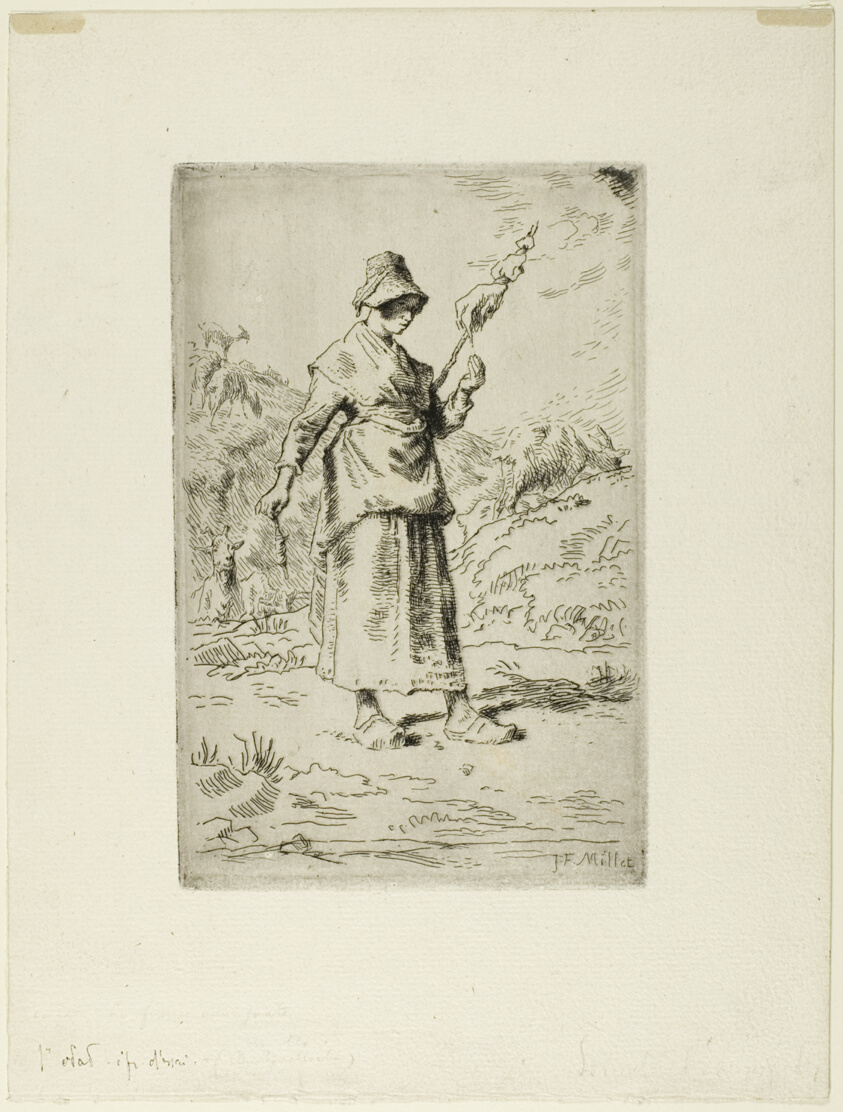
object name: Print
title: The Spinner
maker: Jean François Millet (French, 1814-1875)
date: 1868–69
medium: Etching with traces of drypoint on ivory laid paper attached to cream wove card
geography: France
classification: etching; print; prints and drawing